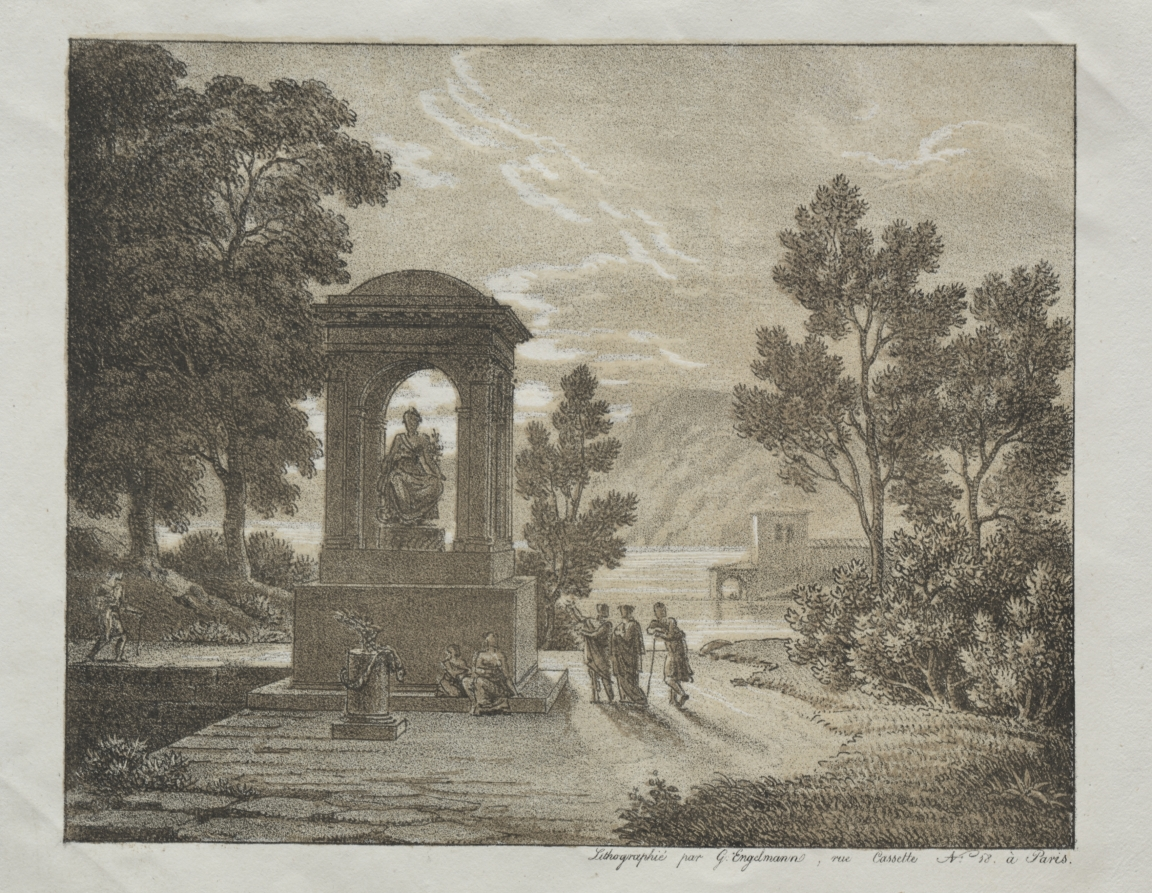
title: Book of Lithograph Trials using different means of Drawing such as Crayon, Pen, Brush, and Wash: A Landscape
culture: France, 19th century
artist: Godefroy Engelmann (French, 1788–1839)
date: c. 1816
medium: lithograph printed in black and ochre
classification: Bound Volume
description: In 1816 Engelmann founded one of the first lithographic workshops in France. This book was published to exemplify the versatility of lithography, probably as an attempt to interest artists in the medium. While A Landscape demonstrates the use of a tone plate—here printed in ochre—to realize a colored background, other pages illustrate how lithography can imitate wood engraving or be used to draw a detailed map.